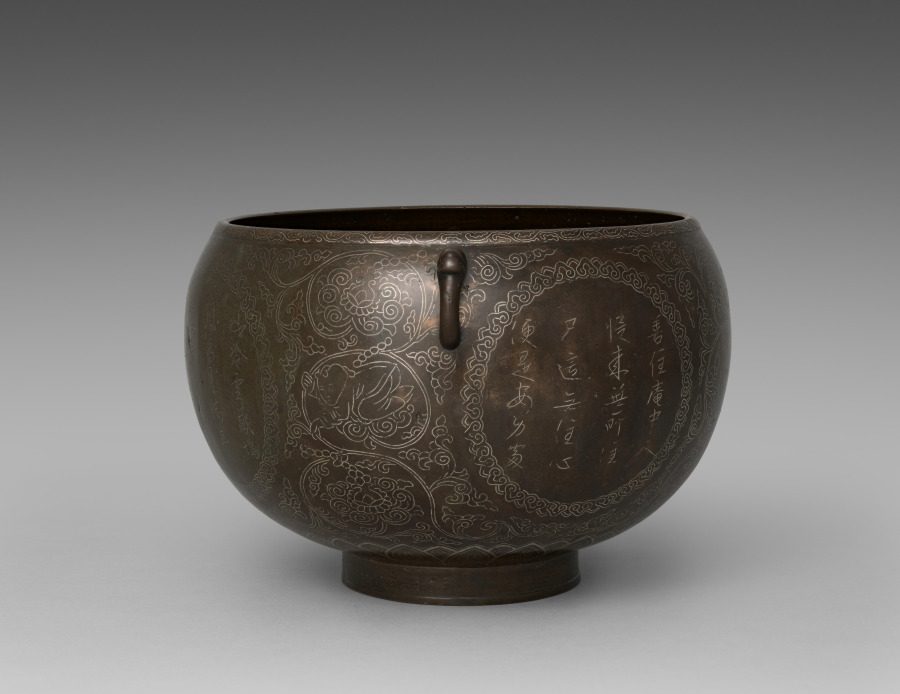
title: Basin with Inscribed Figures and Calligraphy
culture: Korea, Goryeo dynasty (918–1392)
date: 1100s–1200s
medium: bronze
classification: Metalwork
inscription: Each of the three roundels contain five-character, four-line poems with Buddhist messages.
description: This bronze basin may have been used for containing purified water. What makes this work charming is its intricate decoration done in silver inlay: the five-character, four-line poems interspersed among images of a child. The poems, which evoke the concept of nonattachment and nonduality, were written by Buddhist monks.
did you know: A child, one of the main decorative elements for this basin, is possibly a young Buddhist pilgrim named Sudhana, who took a long spiritual journey to search for enlightenment.